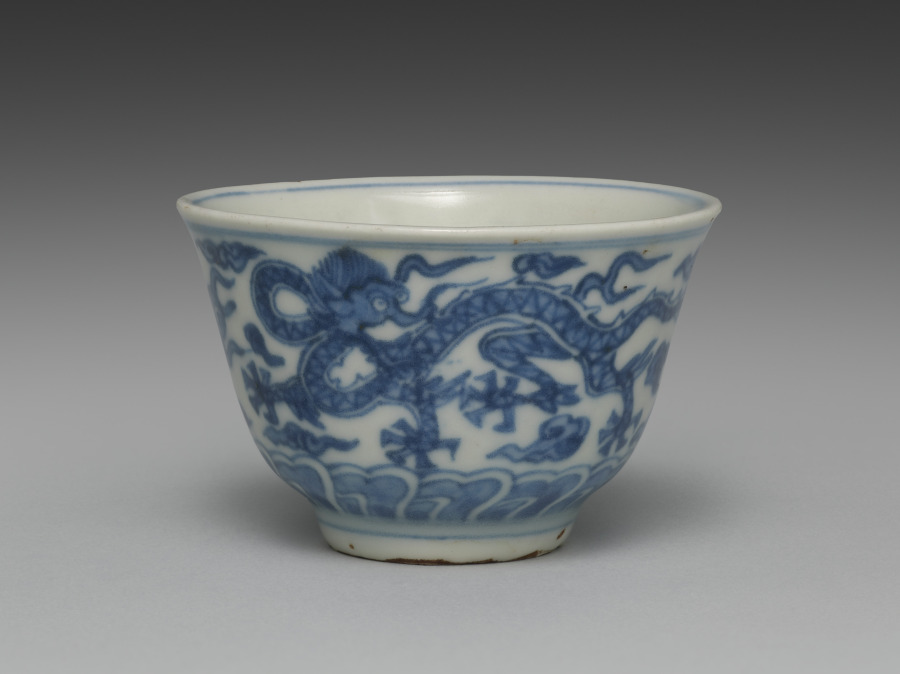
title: Cup from Tea Cups with Dragons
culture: Japan, Edo period (1615–1868)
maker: Seifū Yohei I (Japanese, 1801–1861)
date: 1840s–57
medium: One from a set of five tea cups; porcelain with underglaze blue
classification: Ceramic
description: Seifū Yohei I made both blue and white porcelains after Ming dynasty (1368–1644) Chinese wares fired in the kilns at Jingdezhen for export. He also made colorful stoneware in the style of his teacher, Nin’ami Dōhachi (Takahashi Dōhachi II) (1783–1855).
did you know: A small figure of an elephant serves as the handle for the lid.